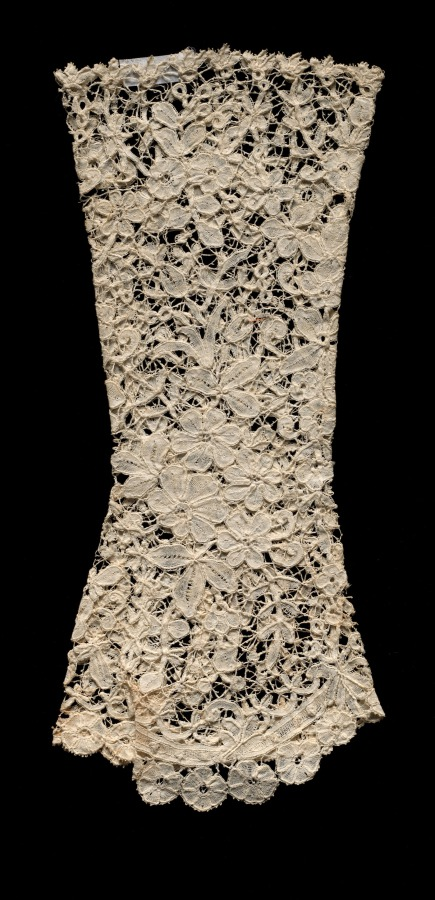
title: Glove (one of a pair)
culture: Flanders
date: c. 1850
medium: Bobbin lace (Duchese lace)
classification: Lace